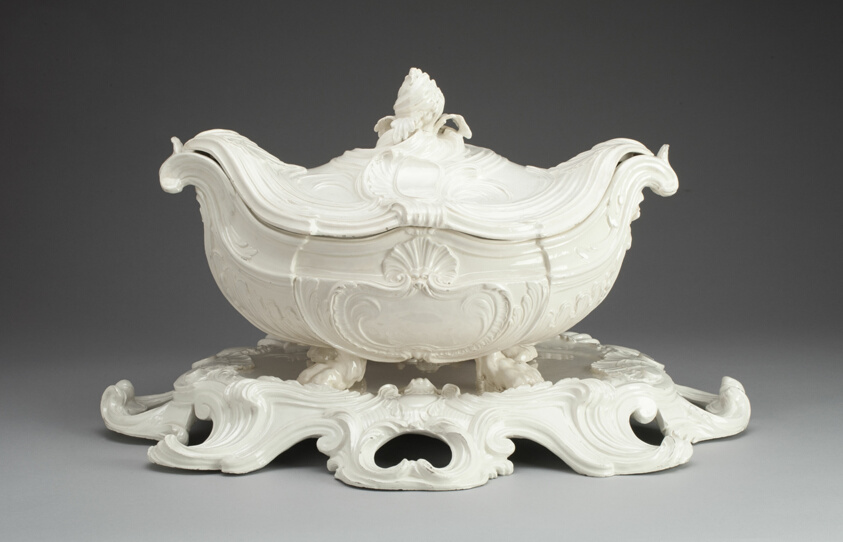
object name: Ceramics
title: Tureen and Stand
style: Rococo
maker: Pont-aux-Choux Manufactory; French, founded 1743; France, Paris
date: c. 1750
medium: Lead-glazed earthenware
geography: Paris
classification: tin-glazed ware; ceramics; earthenware; european decorative arts